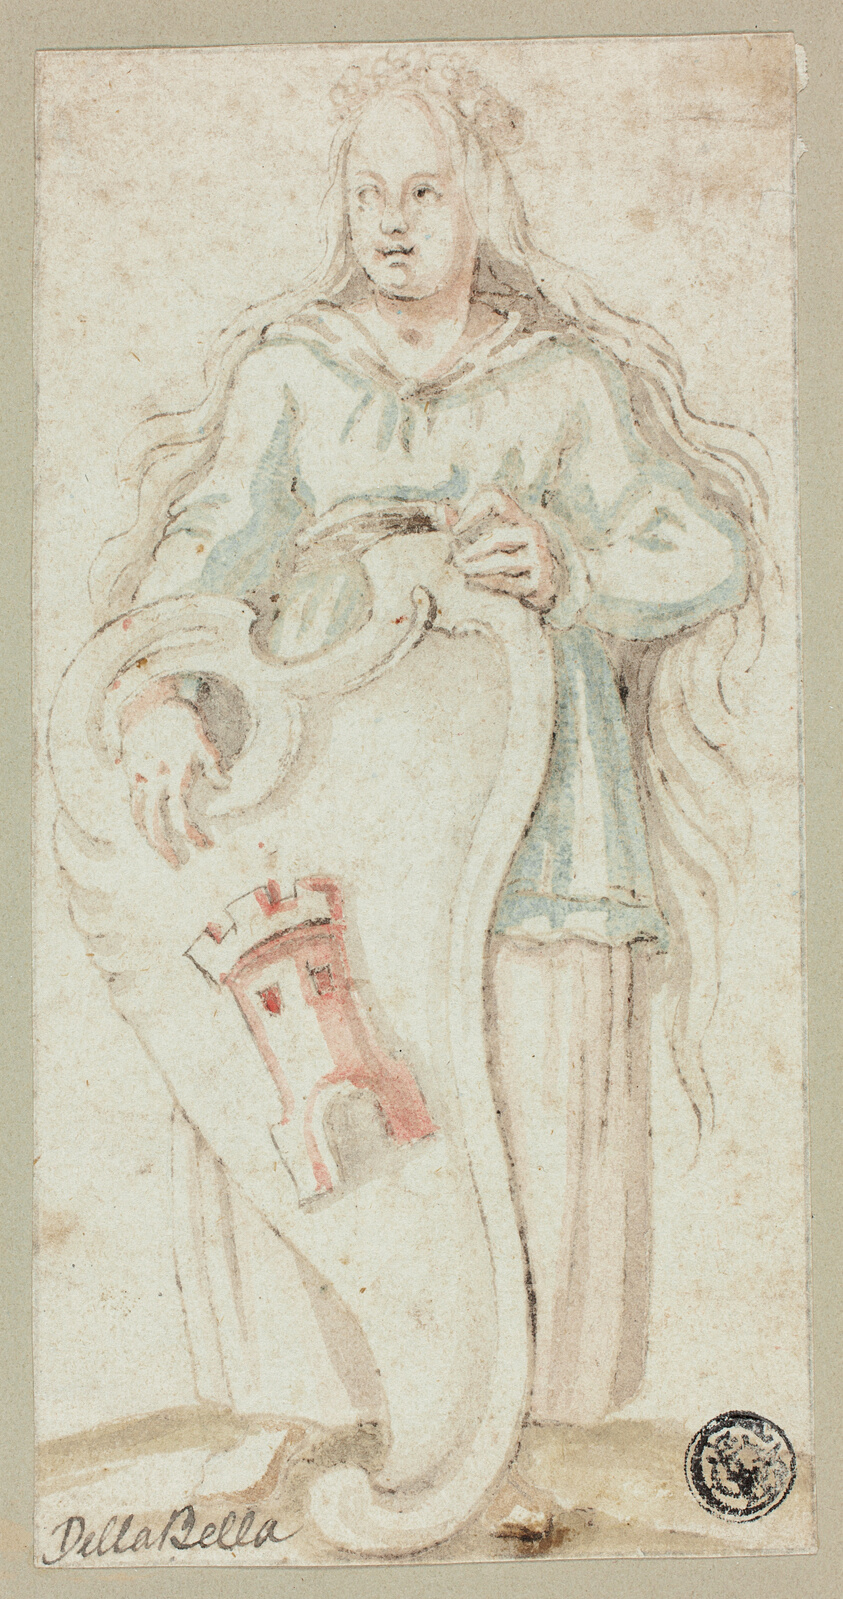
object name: Drawing and Watercolor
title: Saint Barbara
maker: Unknown artist (17th century (?))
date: c. 1600-1700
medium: Pen and brown ink, with brush and green, red, brown, and pink washes, on ivory laid paper, tipped onto gray card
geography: Italy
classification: pen and ink drawings; drawings (visual works); prints and drawing